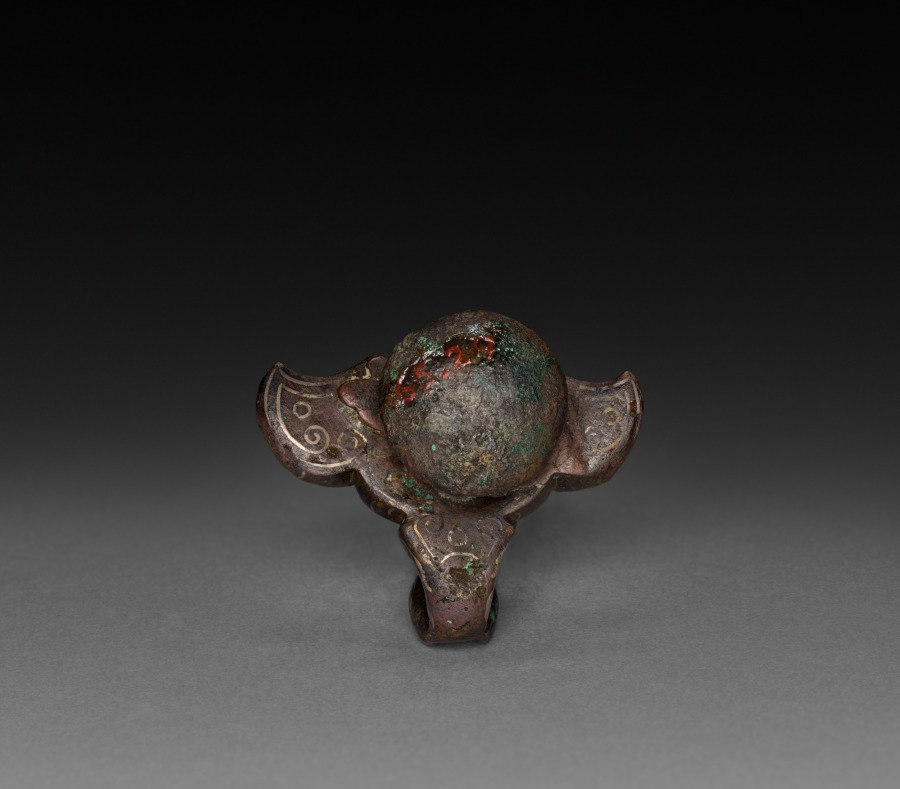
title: Belt Hook (Daigou) in the Form of a Buffalo or Elephant Head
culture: China, Eastern Zhou dynasty (770–256 BCE), Warring States period (475–221 BCE)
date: c. 481–400 BCE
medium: bronze with silver inlay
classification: Metalwork